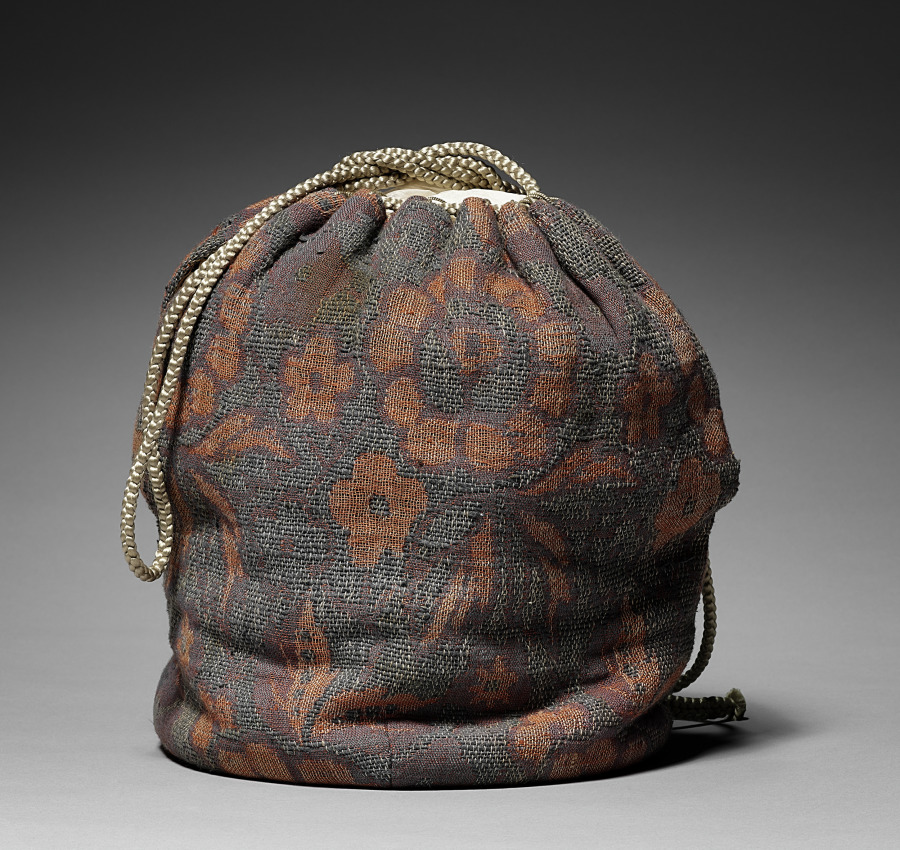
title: Water Container (Mizusashi) with Riverscape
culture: Japan, Momoyama period (1573-1615) to Edo period (1615-1858)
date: late 1500s–early 1600s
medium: Stoneware with underglaze iron oxide slip decoration (Mino ware, Shino type)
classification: Ceramic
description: Mizusashi are jars used to hold water for the preparation of tea at tea gatherings. This one was produced in the Mino area of present-day Gifu prefecture in central Japan, and is considered one of the finest of its type in existence, based on the complex aesthetic sensibilities developed around the tea ceremony in Japan. It is called a “picture Shino” (e-shino) mizusashi, as it has an abstracted design said to resemble an ink painting of reeds along a river bank and small boats in a river on one side, and a geometric pattern on the other. With its irregular shape and thick, luminous glaze, it is of a variety favored by eminent tea masters of the Momoyama period.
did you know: The water this container held during a tea ceremony was used to fill the kama, or iron pot in which the water is heated.